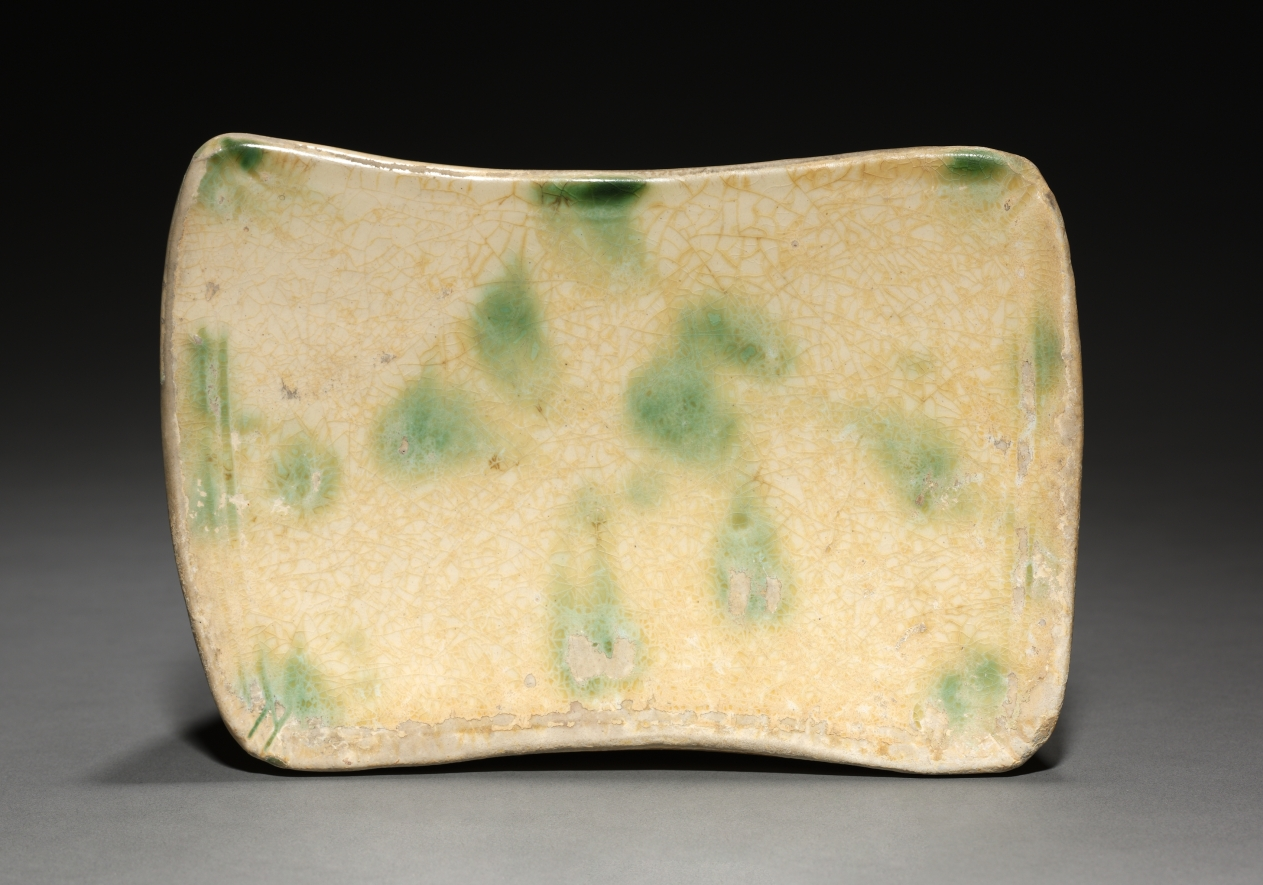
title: Pillow: Wazhaping ware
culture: China, Hunan province, Changsha, Five dynasties (907-960)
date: 906–960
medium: glazed stoneware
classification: Ceramic